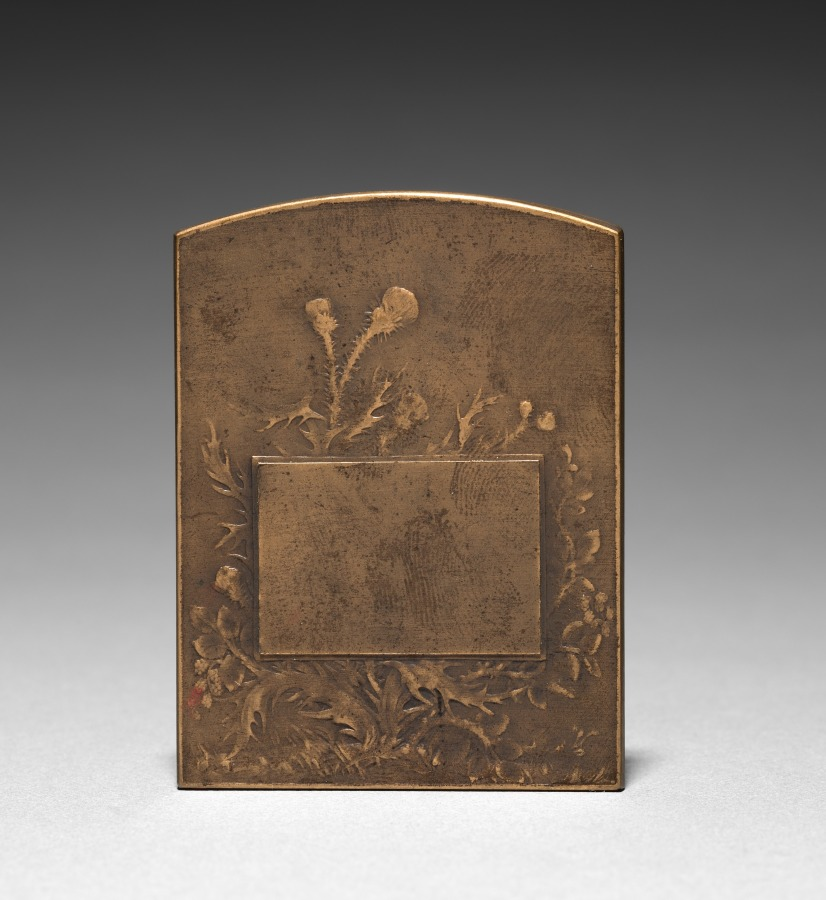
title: Medallion (reverse)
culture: France, 19th century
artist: Marie Alexandre Lucien Coudray (French, 1864–1932)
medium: bronze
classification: Metalwork